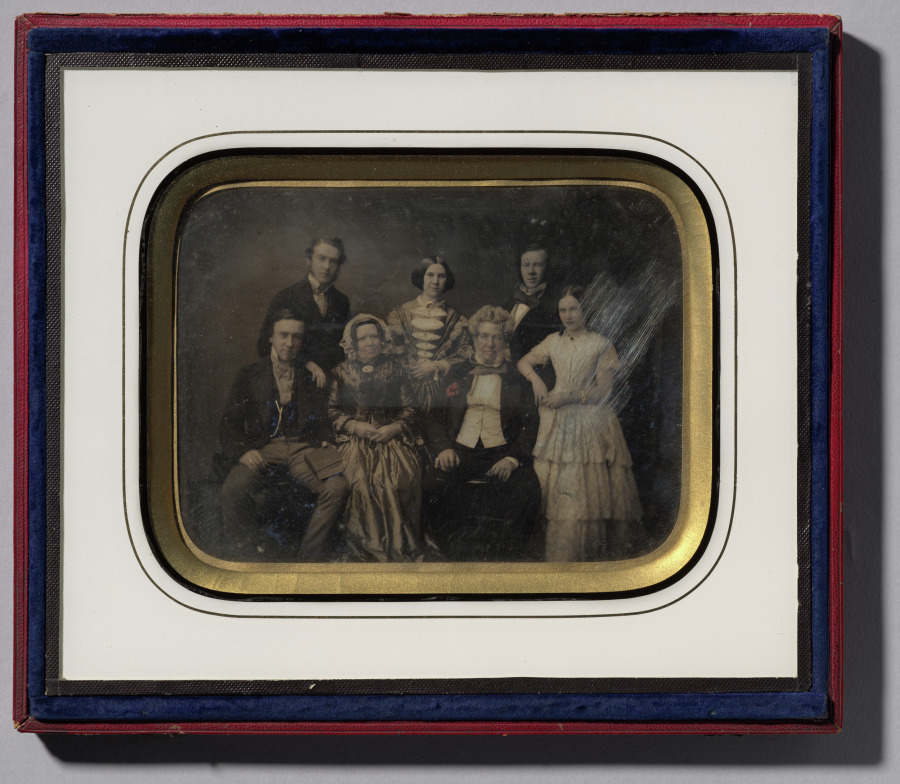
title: English family of seven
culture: England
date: c. 1840s-1850s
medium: daguerreotype, half-plate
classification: Photograph